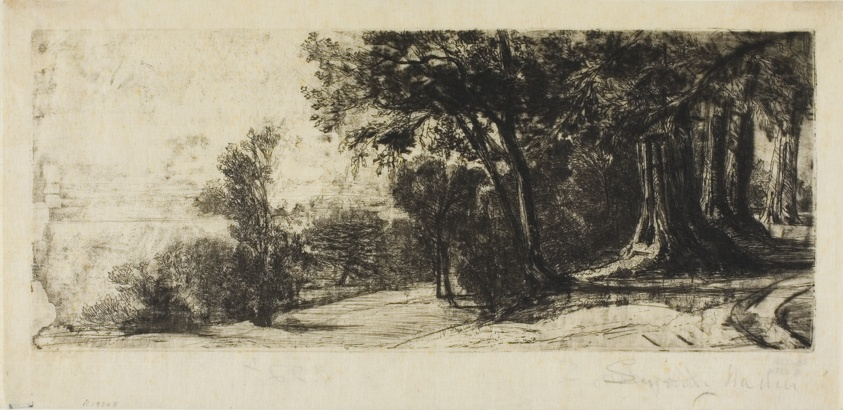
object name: Print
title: Early Morning, Richmond Park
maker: Francis Seymour Haden (English, 1818-1910)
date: 1859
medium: Etching and drypoint on cream Japanese paper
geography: England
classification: etching; print; prints and drawing